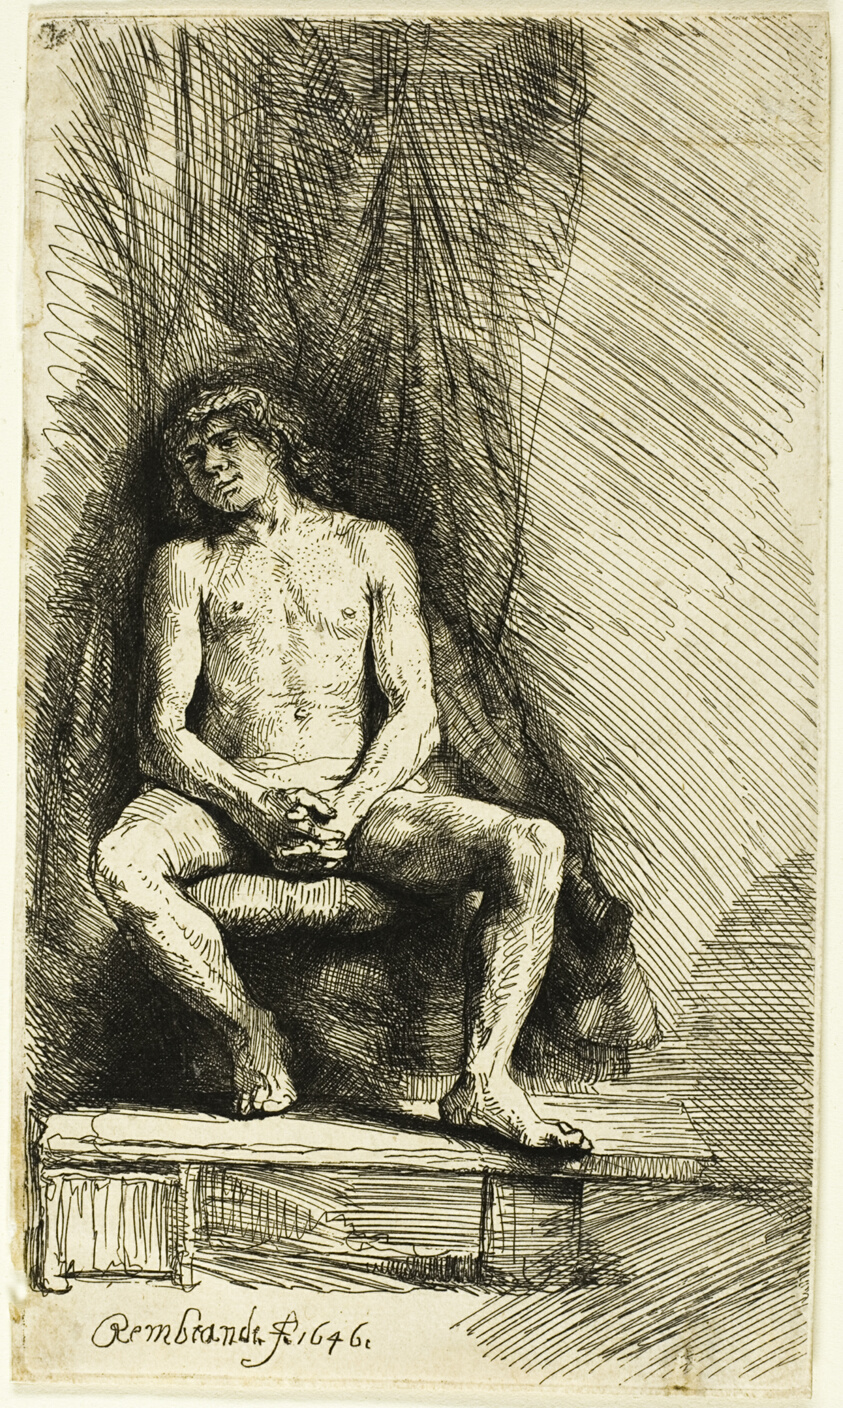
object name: Print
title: Nude Man Seated before a Curtain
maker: Rembrandt van Rijn (Dutch, 1606-1669)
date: 1646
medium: Etching on ivory laid paper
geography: Holland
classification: etching; print; prints and drawing; paper